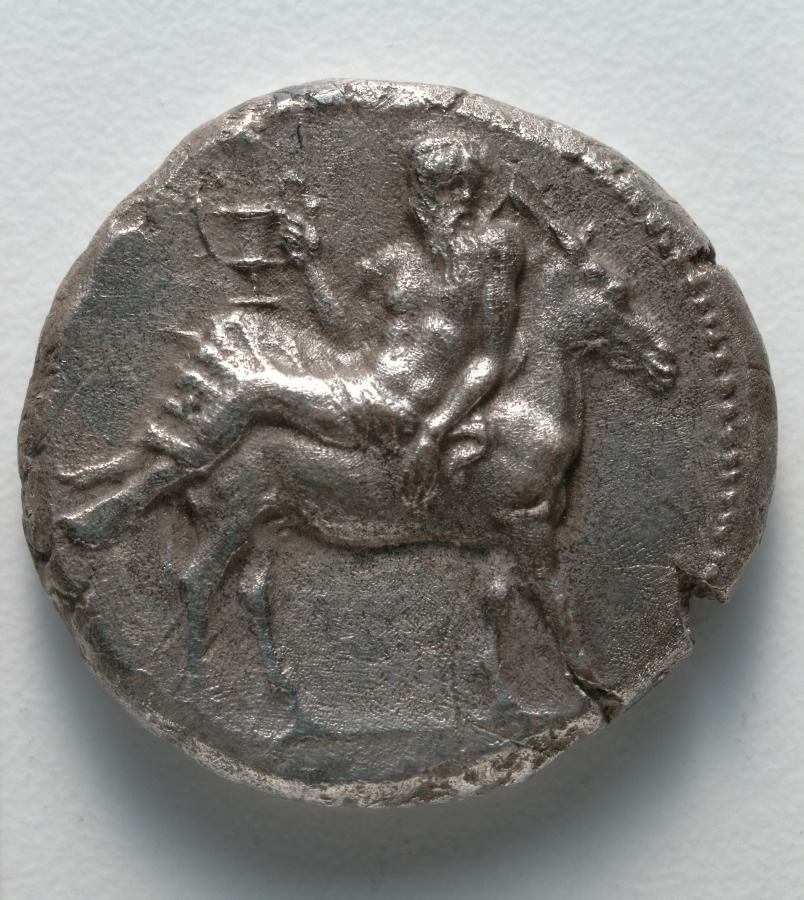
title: Tetradrachm: Dionysos on Donkey (obverse); Grapevine (reverse)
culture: Greek, minted at Mende (Chalkidiki)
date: c. 430 BCE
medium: silver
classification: Coins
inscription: ΜΕΝΔΑΙΟΝ